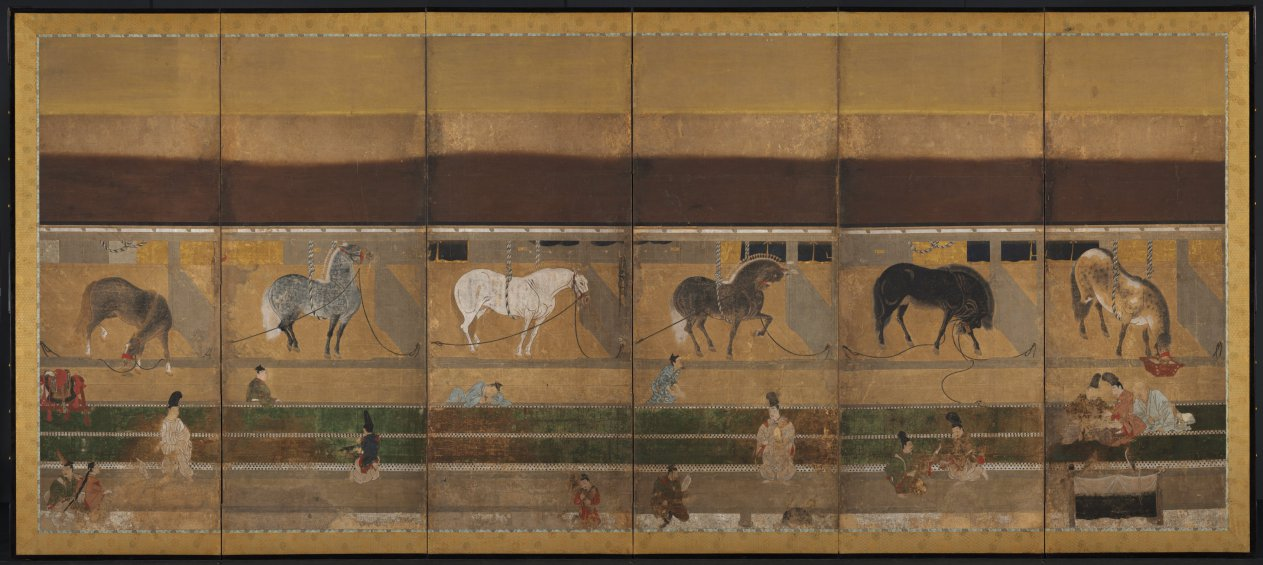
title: Horse Stable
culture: Japan, Muromachi period (1392–1573)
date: early 1500s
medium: One of a pair of six-panel folding screens; ink, color, and gold on paper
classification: Painting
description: Prized horses in stables may be the main theme of the pair of screens of which this screen is a part, but a lot of action is happening on the veranda. Falconry is the focus of this screen, and a lively atmosphere develops in the interplay of the dynamic horses and the birds of prey.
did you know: This is the earliest surviving example of the "horse stable" theme in Japanese screens.